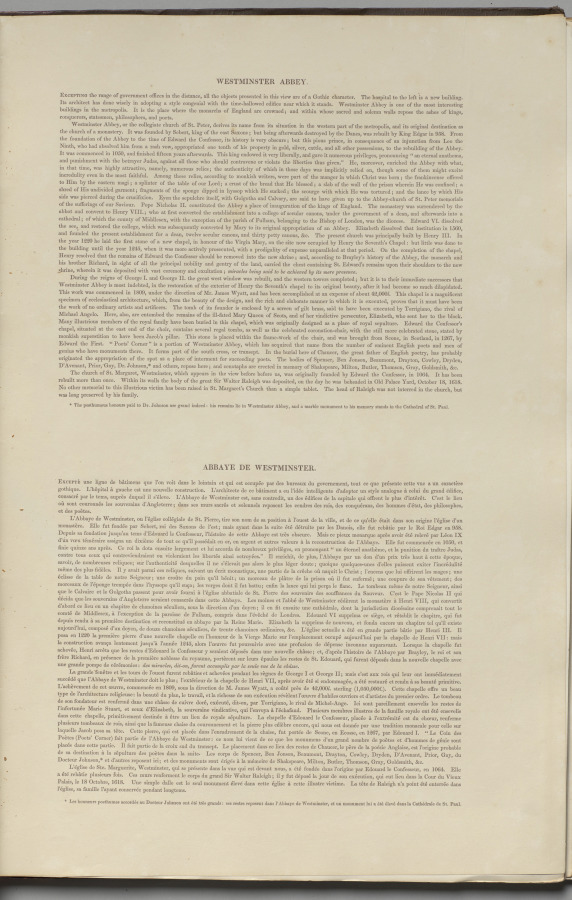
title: London As It Is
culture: England, 19th century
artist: Thomas Shotter Boys (British, 1803–1874)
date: 1842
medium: lithograph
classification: Bound Volume